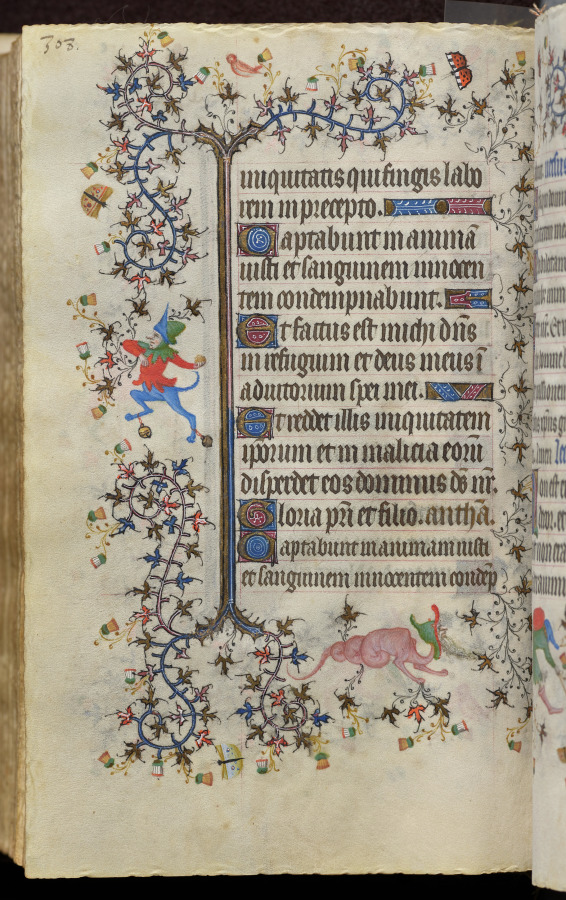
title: Hours of Charles the Noble, King of Navarre (1361-1425): fol. 154v, Text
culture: France, Paris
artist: Master of the Brussels Initials and Associates (French)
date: c. 1405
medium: ink, tempera, and gold on vellum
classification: Bound Volume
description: This precious volume was obviously highly prized by its owner, the French-born King of Navarre, who had his coat of arms painted on no less than twenty folios. Rather than directly commissioning this manuscript from a specific workshop, it seems that Charles the Noble acquired his book of hours -- perhaps ready-made for the luxury market -- while on a trip to Paris in 1404-05. A collaborative effort, six painting styles are evidenced within the pages of this codex, those of two Italians, two Frenchmen, and two Netherlanders. The painter who was responsible for the planning and decoration of the book, and who produced seventeen of the large miniatures, was a Bolognese artist known as the Master of the Brussels Initials. His principal assistant, responsible for most of the borders, was a Florentine who signed his name "Zecho" da Firenze on folio 208 verso.